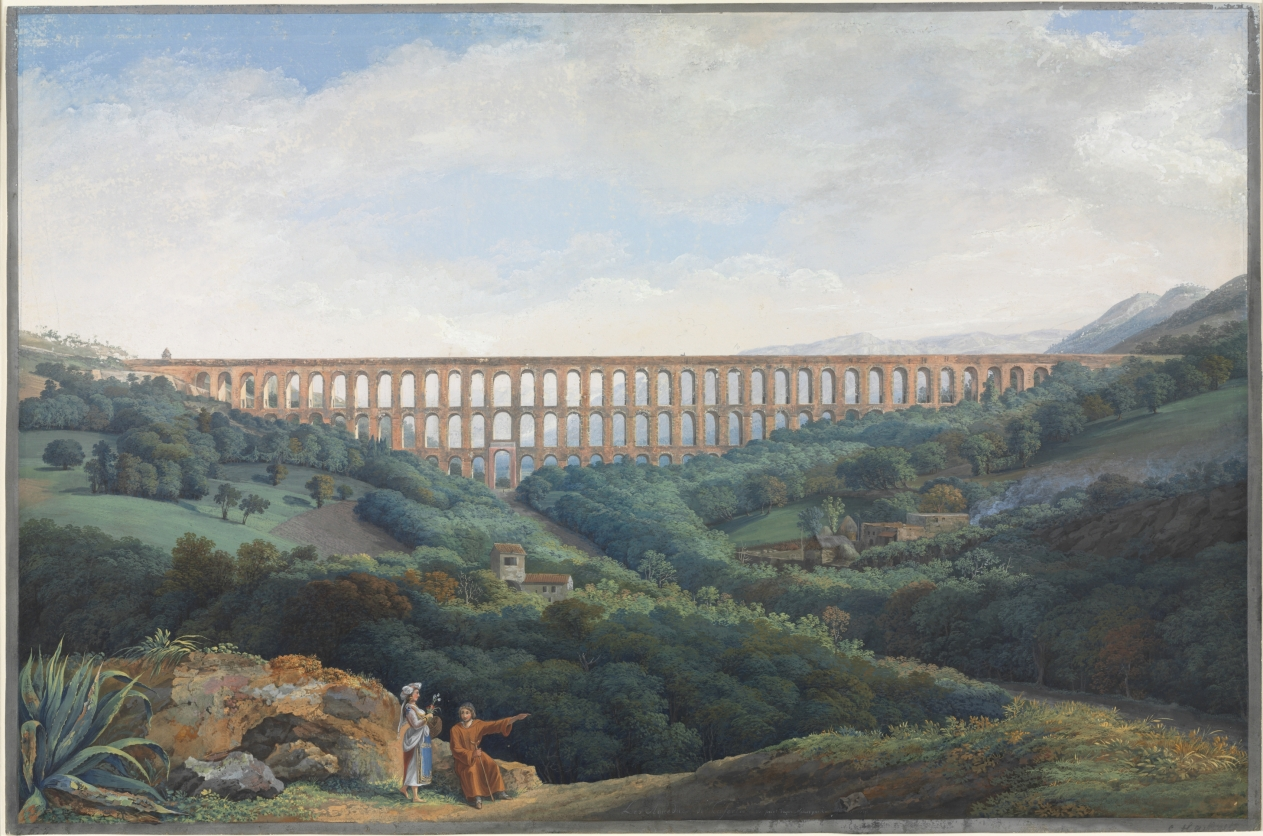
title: The Aqueducts at Caserta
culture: Germany, 18th century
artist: Carl Ludwig Hackert (German, 1751–1798)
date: 1789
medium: gouache with graphite underdrawing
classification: Drawing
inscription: lower center, in gray watercolor: "Les Aqueducs de Caserta peint d'apres Nature par Carl Hakert 1789"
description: Such highly finished drawings by Hackert, younger brother of Jakob Philipp Hackert (who painted Waterfall of Marmore at Terni), are extremely rare. The Hackert brothers were among the first Romantic artists to adopt the practice of drawing and painting en plein air in Rome. Italians were amazed when they saw the artists roaming the countryside with large portfolios, executing finished outline drawings entirely from nature. This drawing accurately represents an aqueduct built in the middle of the 18th century in southern Italy. The degree of finish, meticulous detail of the vegetation and rocks in the foreground, recession of space, and subtle treatment of light are astonishing.